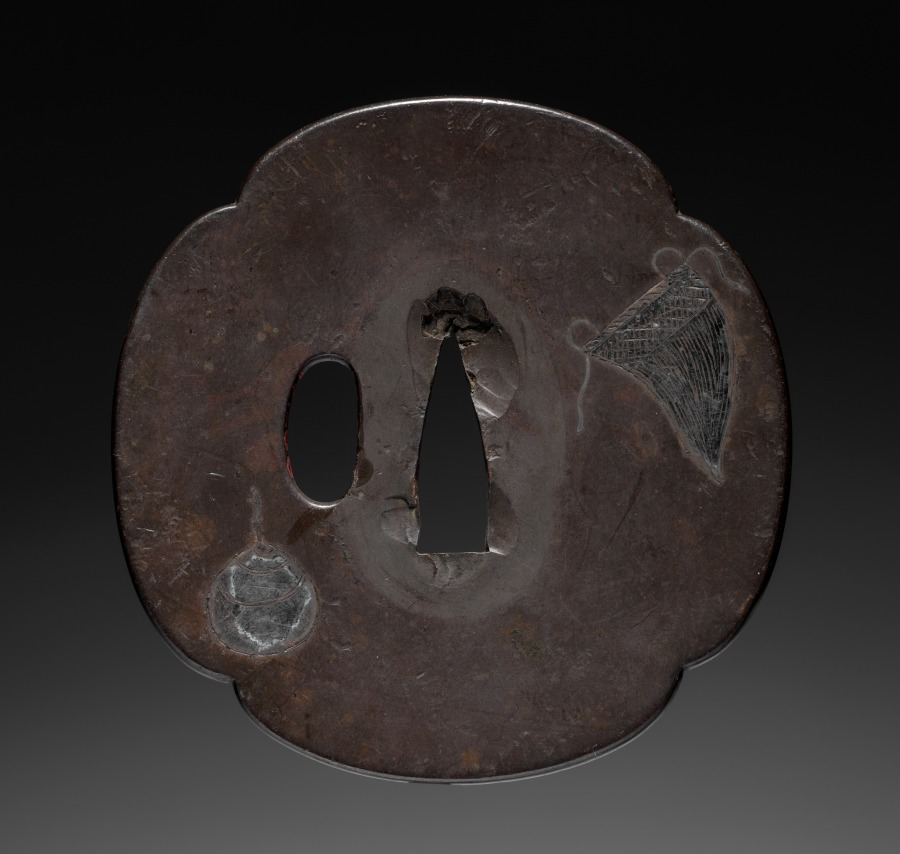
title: Sword Guard (Tsuba) with Treasure Motifs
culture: Japan, possibly Edo period (1615-1868)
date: c. 1615–1868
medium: iron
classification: Arms and Armor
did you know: This sword guard features the sacred jewel, magic mallet, hat of invisibility, and magic bag motifs.